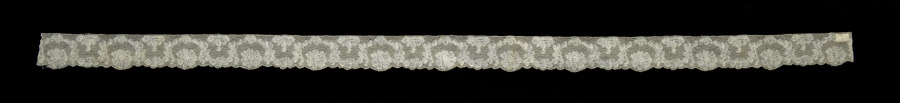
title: Lace Edging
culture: France, Valenciennes or Flanders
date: 1700s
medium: Linen: bobbin lace (Valenciennes)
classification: Lace